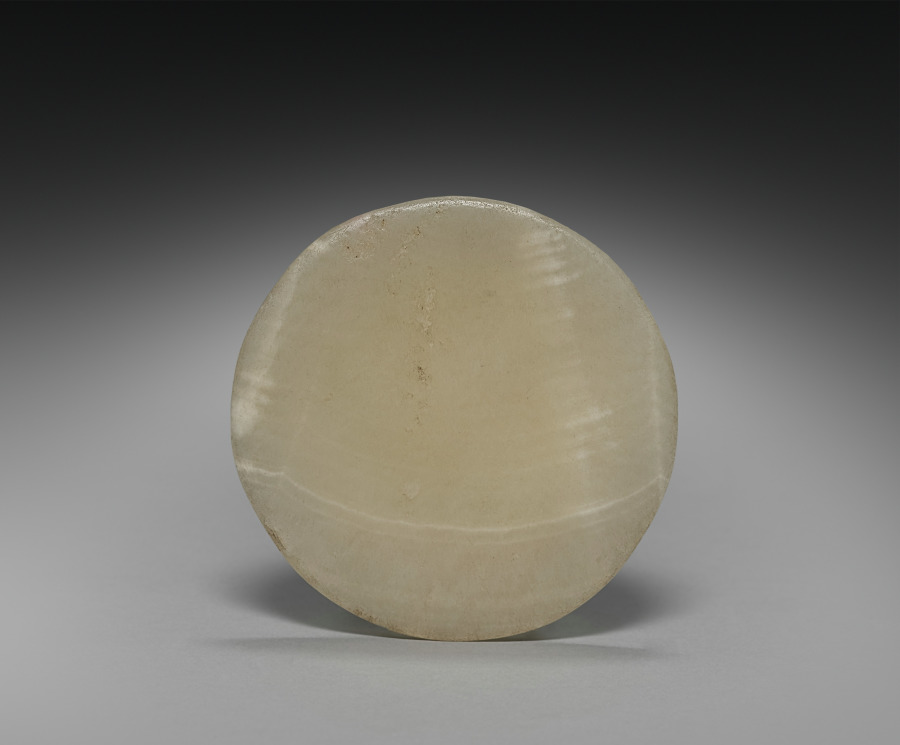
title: Long-Necked Flask with Lid (Lid)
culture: Egypt, New Kingdom (1540–1069 BCE), Dynasty 18, reign of Tuthmosis III (1479–1425 BCE)–reign of Amenhotep III (1390–1352 BCE)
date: 1401–1353 BCE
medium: travertine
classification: Vessels